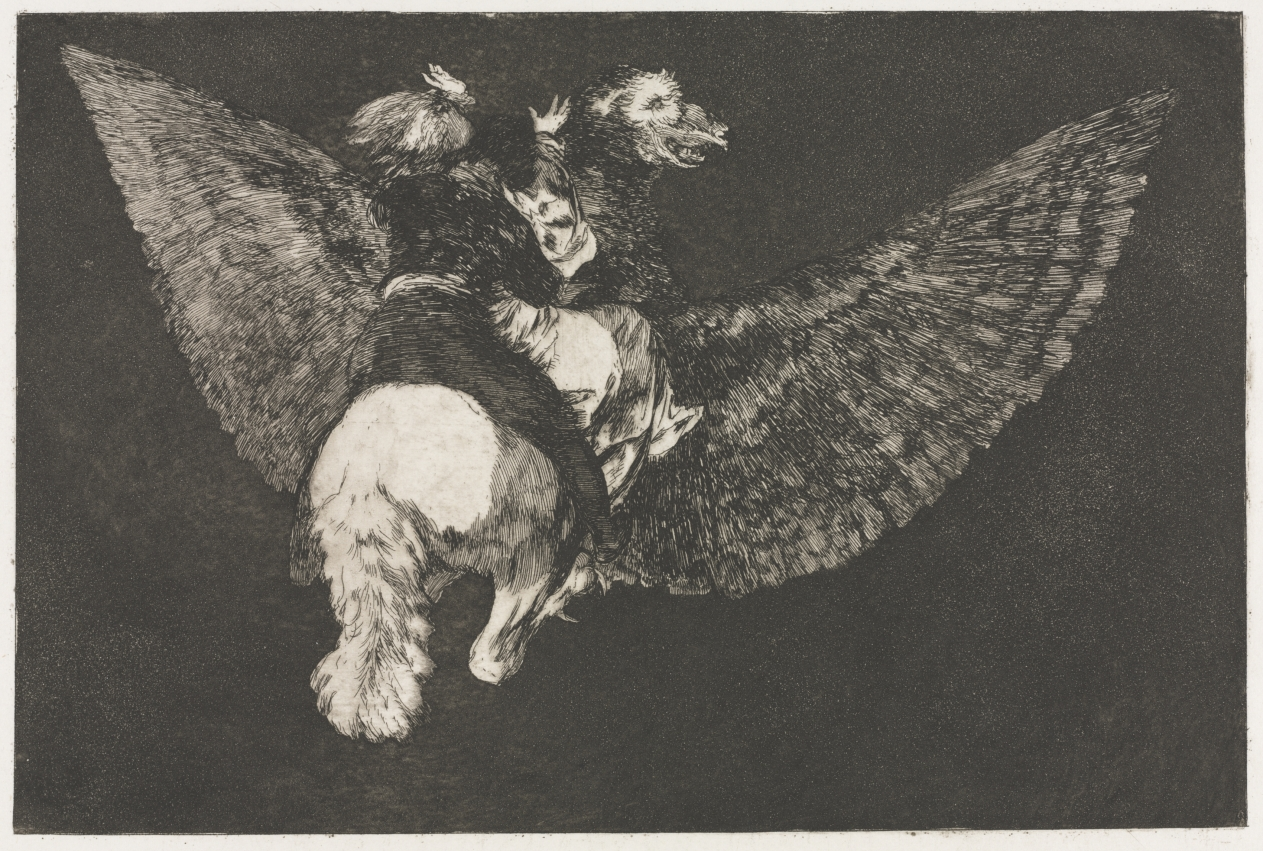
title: The Proverbs: Flying Folly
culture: Spain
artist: Francisco de Goya (Spanish, 1746–1828)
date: 1864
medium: etching and aquatint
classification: Print